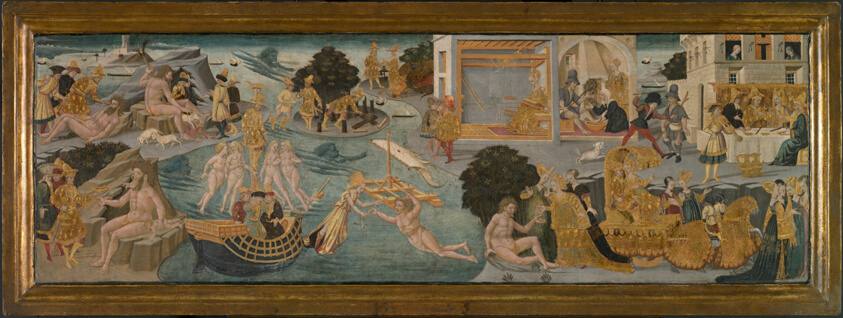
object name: Painting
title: The Adventures of Ulysses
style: 15th century, Renaissance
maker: Apollonio di Giovanni (Italian, 1415/17-1465)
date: 1435–45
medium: Tempera on panel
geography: Italy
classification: tempera; paint; wood; painting; european painting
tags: Greek mythology, classical